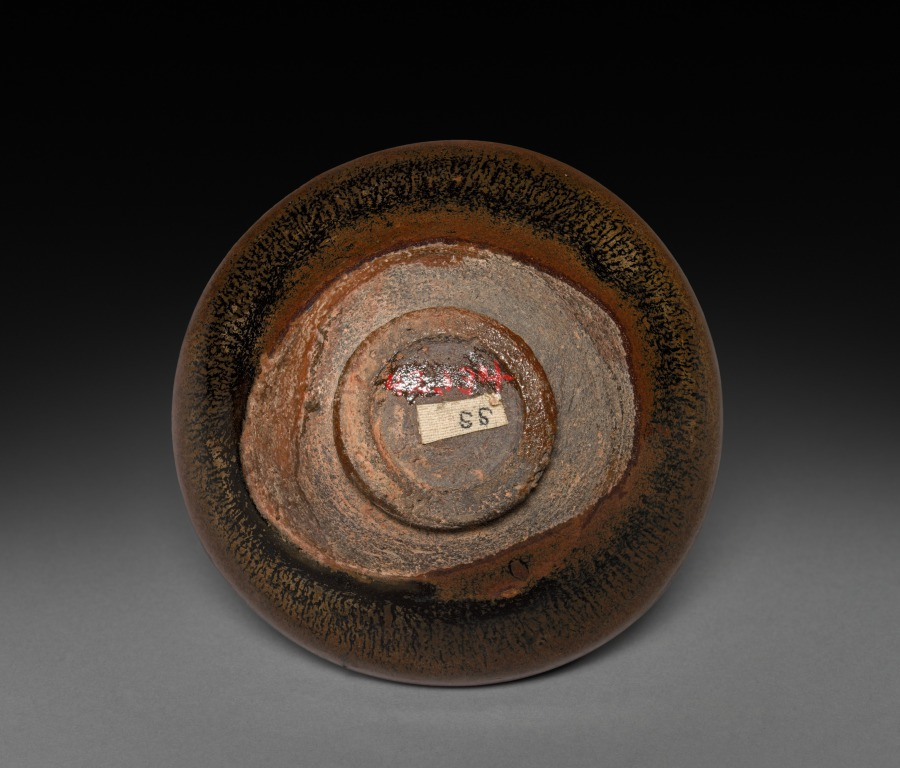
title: Tea Bowl: Jian ware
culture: China, near Shui ch'i, Song dynasty (960-1279)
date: 960–1279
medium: purplish brown stoneware with iron slip glaze coating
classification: Ceramic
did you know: Jian ware was very popular with the tea cultures in China and Japan.